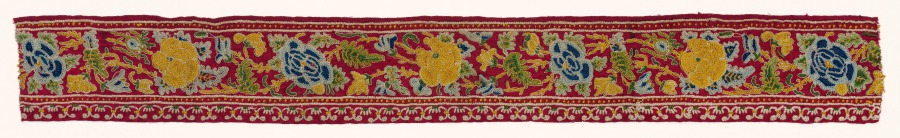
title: Fragment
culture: China, 20th century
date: first half 1900s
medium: embroidery, silk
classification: Embroidery